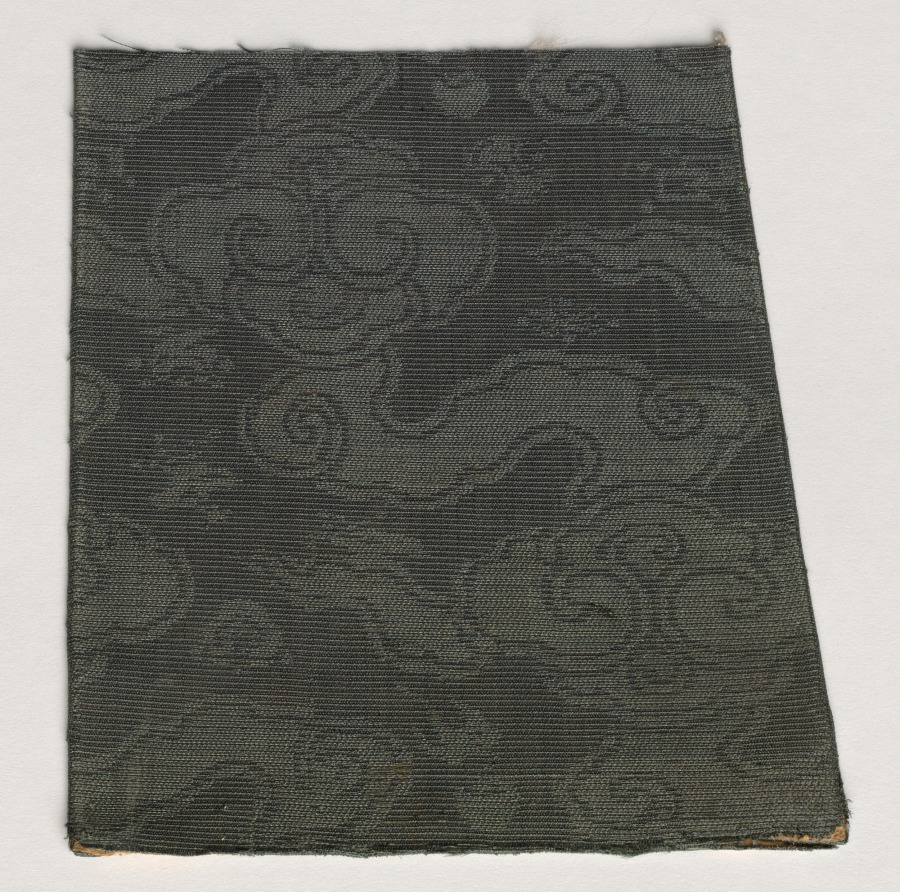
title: Book Cover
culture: China, 19th century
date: 1800s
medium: silk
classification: Textile